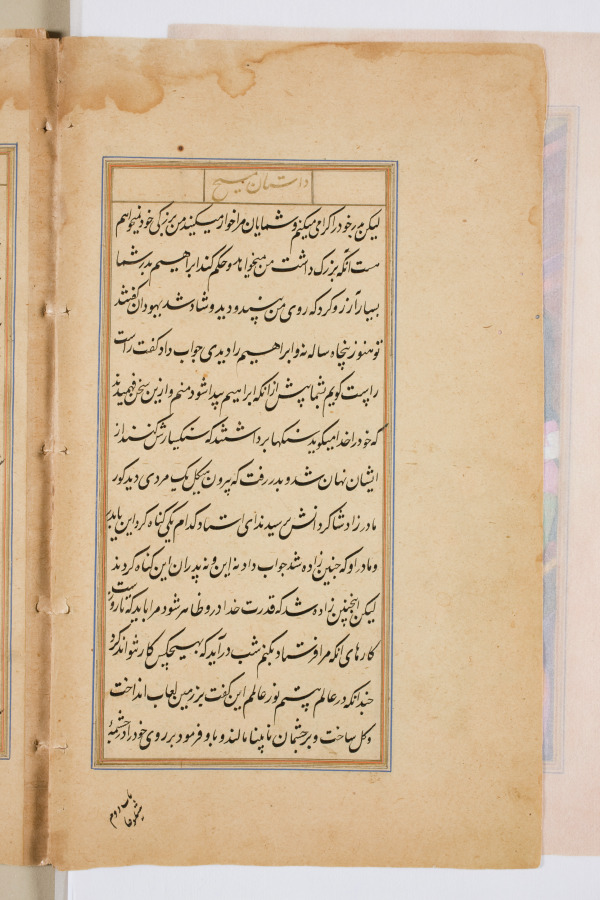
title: Text page from a Mirror of Holiness (Mir’at al-quds) of Father Jerome Xavier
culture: Mughal India, Allahabad, made for Prince Salim (1569–1627)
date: 1602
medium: Ink and gold on paper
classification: Manuscript